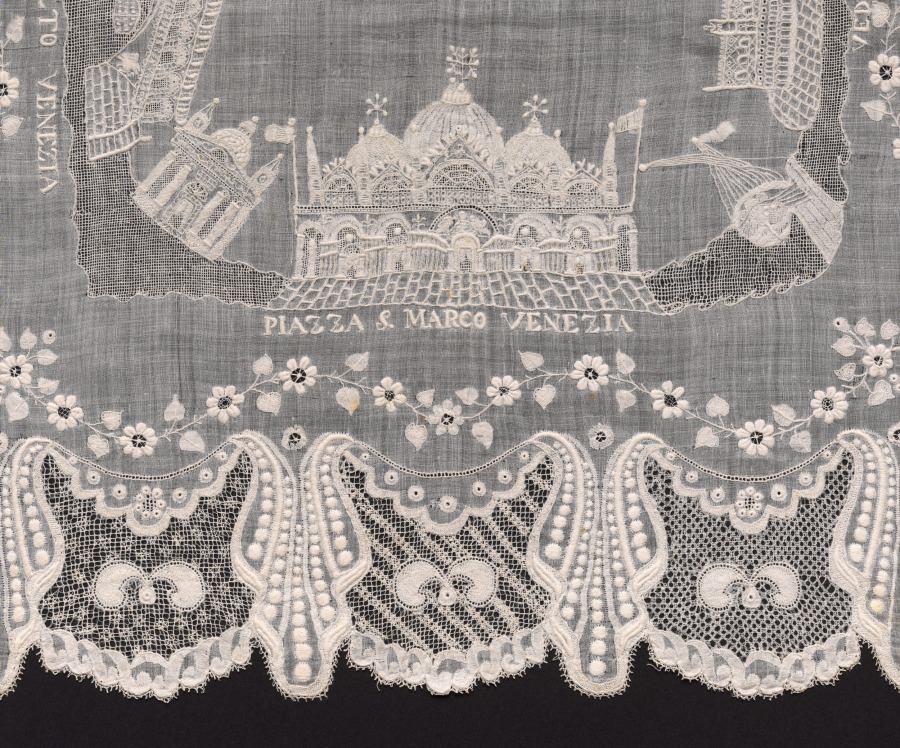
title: Handkerchief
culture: Italy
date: 1800s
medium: Plain weave linen with needle lace (drawnwork) and embroidery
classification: Embroidery